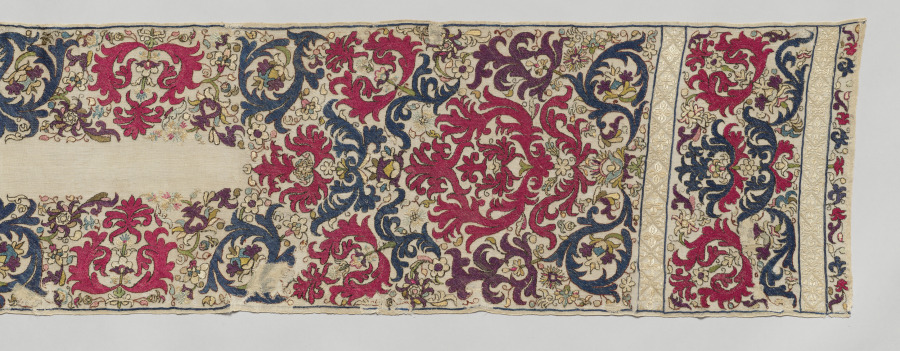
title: Headkerchief (tensifa)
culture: Africa, North Africa, Algeria, Algerian embroiderer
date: 1700s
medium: Linen, silk, gold, silver, dye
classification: Embroidery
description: This beautiful kerchief, worn wrapped around the head, was part of elegant bathing equipment that well-to-do women wore while relaxing in a hammam after bathing. The floral and foliate embroidery reflect a fashion that lasted for more than a century. This example is dominated by brilliant crimson and blue silk stitches.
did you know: This textile was displayed in the CMA’s first exhibition in 1916. While it is from North Africa, it was displayed in the "Nearer East" gallery.